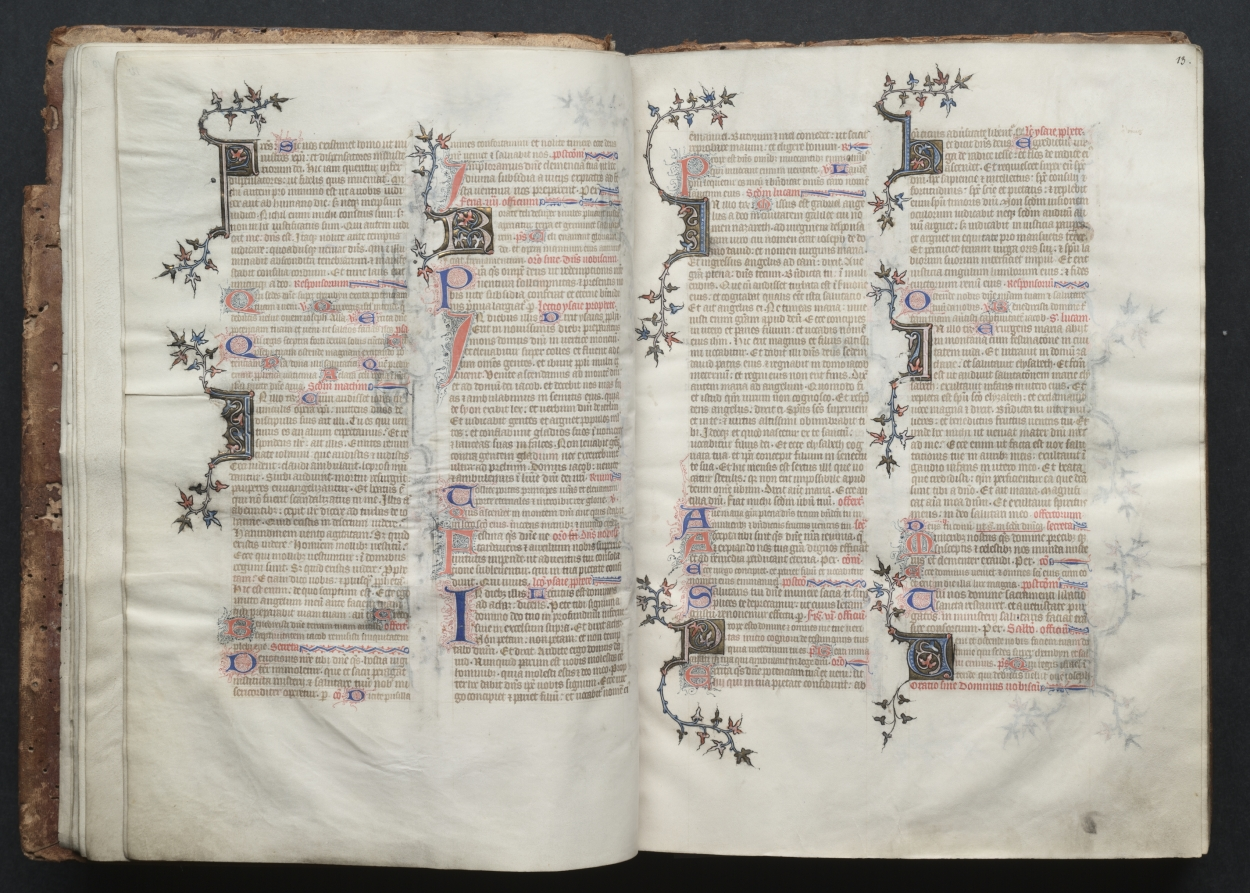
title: The Gotha Missal: Fol. 13r, Text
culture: France, Paris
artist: Master of the Boqueteaux (French)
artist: and Workshop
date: c. 1375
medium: ink, tempera, and gold on vellum; blind-tooled leather binding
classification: Bound Volume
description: The style and quality of this manuscript's decoration is typical of deluxe Parisian books made for aristocratic or royal patrons. Most of the book's decoration appears to be the work of the Master of the Boqueteaux, an artist active at the court of King Charles V (died 1380). His style was apparently shared by a number of book illuminators working in and around Paris. It is very possible that the Gotha Missal belonged to Charles V, but is not provable because the manuscript has no royal portraits and lacks a colophon. Given the book's magnificent decoration, however, it would seem that it was produced for a Valois prince, if not for the king himself. The manuscript receives its name from the German dukes of Gotha, its later owners.